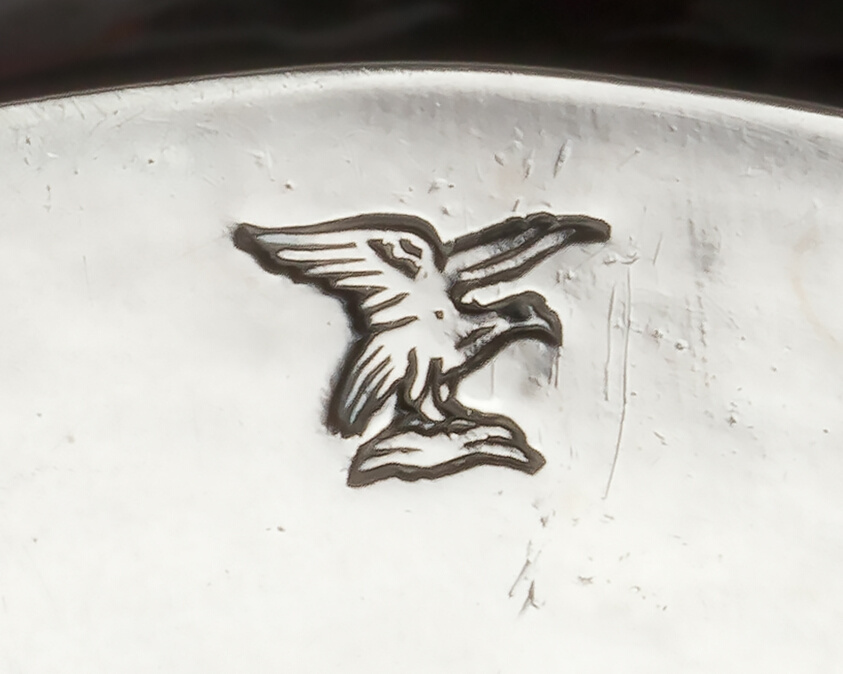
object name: Metalwork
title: Two-Handled Dish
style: Arts and Crafts Movement, American Arts and Crafts Movement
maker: Shreve, Crump and Low (American, founded 1869); Boston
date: 1902–7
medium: Silver and turquoise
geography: Boston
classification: dish (vessel); silver; american decorative arts; american arts; decorative arts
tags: dining, drinking